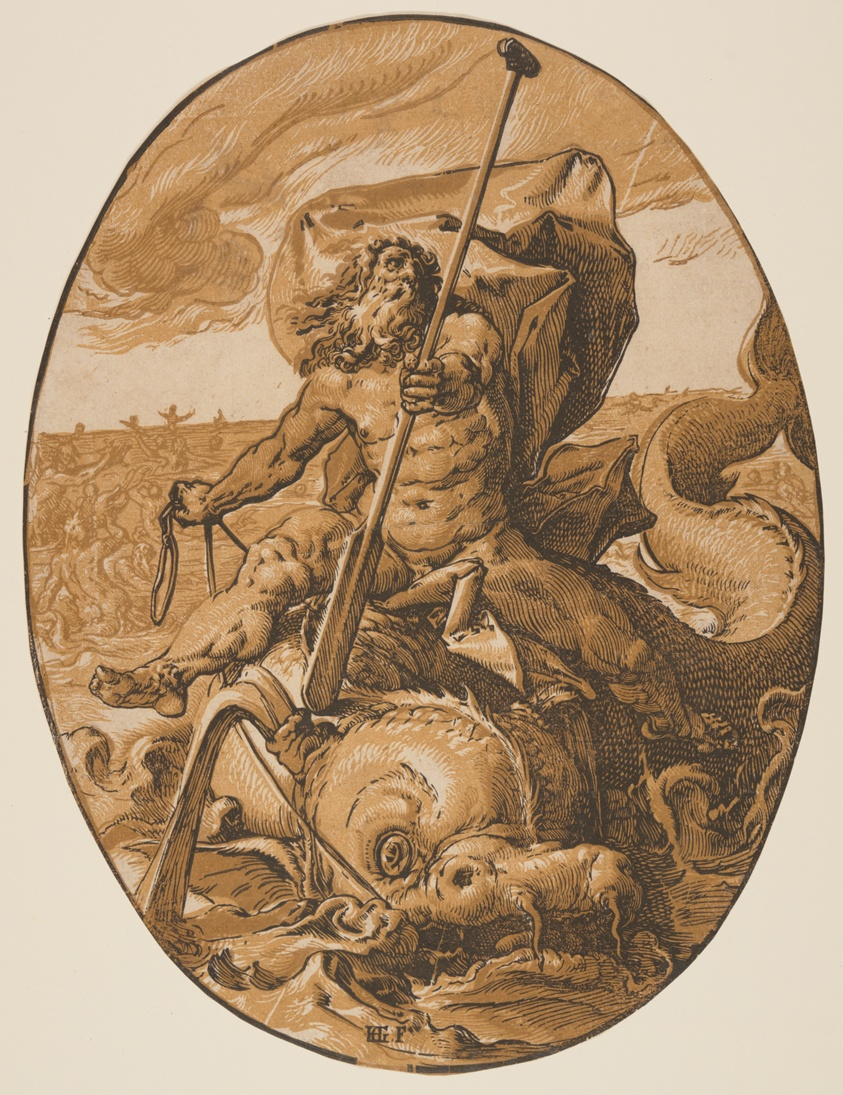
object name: Print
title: Oceanus, from The Deities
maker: Hendrick Goltzius (Dutch, 1558–1617)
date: 1588/90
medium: Chiaroscuro woodcut from three blocks in tan and ochre on ivory laid paper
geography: Netherlands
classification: print; paper; prints and drawing; woodcut